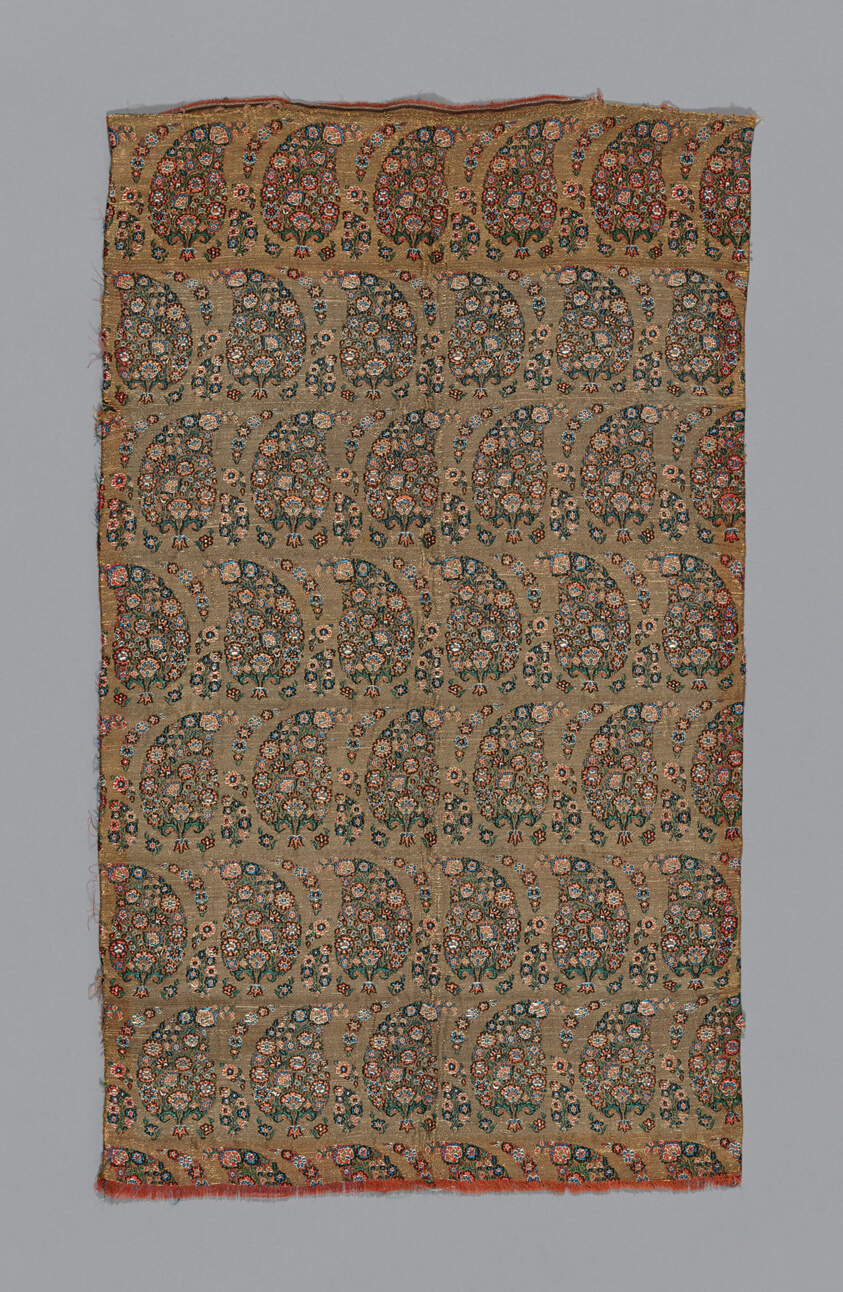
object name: Textile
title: Fragment (Dress Fabric)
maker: Iran (Persia)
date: 1801/50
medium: Silk and gold wound on yellow silk core, plain compound twill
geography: Iran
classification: textile; weaving